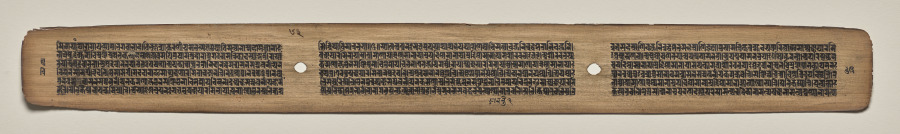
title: Text, Folio 63 (verso), from a Manuscript of the Perfection of Wisdom in Eight Thousand Lines (Ashtasahasrika Prajnaparamita-sutra)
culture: Eastern India, Bihar, Vikramashila Monastery. Painting: Nepal, Kathmandu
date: Sunday, September 14, 1119 (year 239 of the Newar Samvat in the month of Ashvina)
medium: gum tempera and ink on palm leaves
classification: Painting